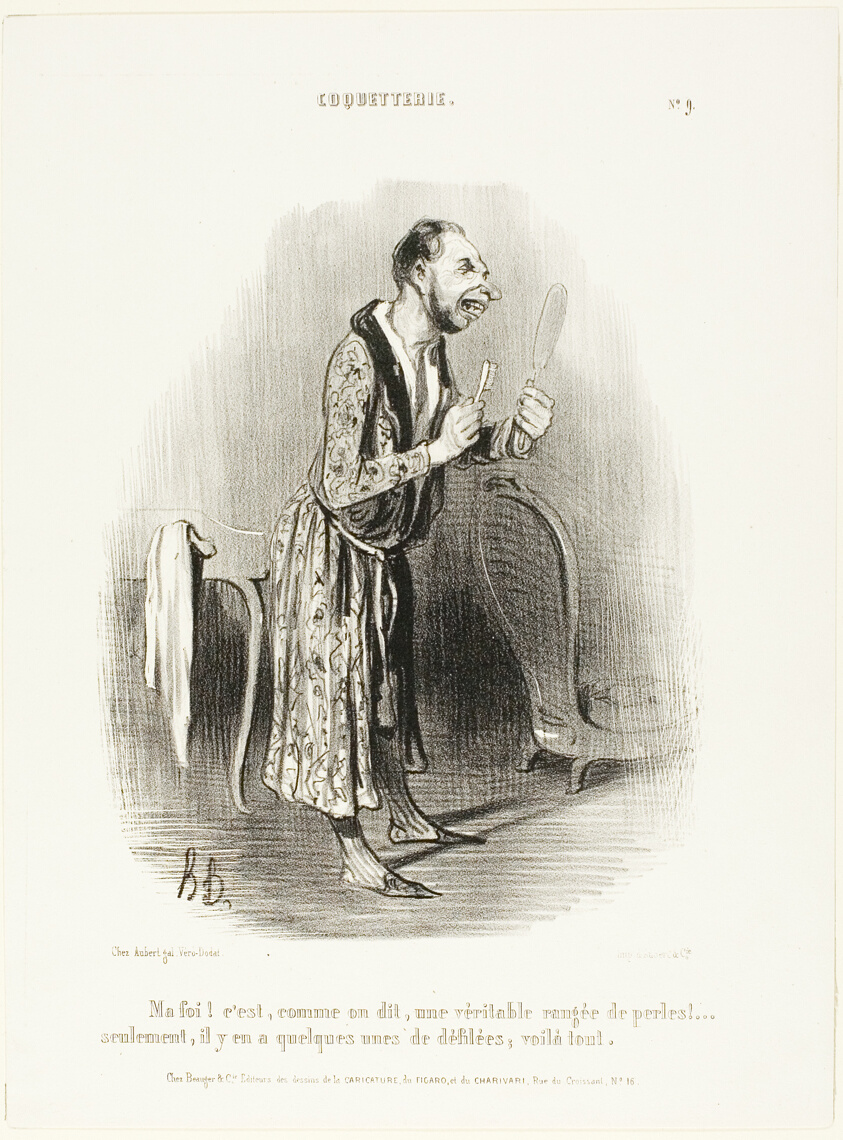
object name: Print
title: “Well...as the saying goes, like a genuine string of pearls, .... only some of them have become unthreaded, that's all!,” plate 9 from Coquetterie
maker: Honoré Victorin Daumier; French, 1808-1879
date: 1840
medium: Lithograph in black on off-white wove paper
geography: France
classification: lithograph; print; prints and drawing